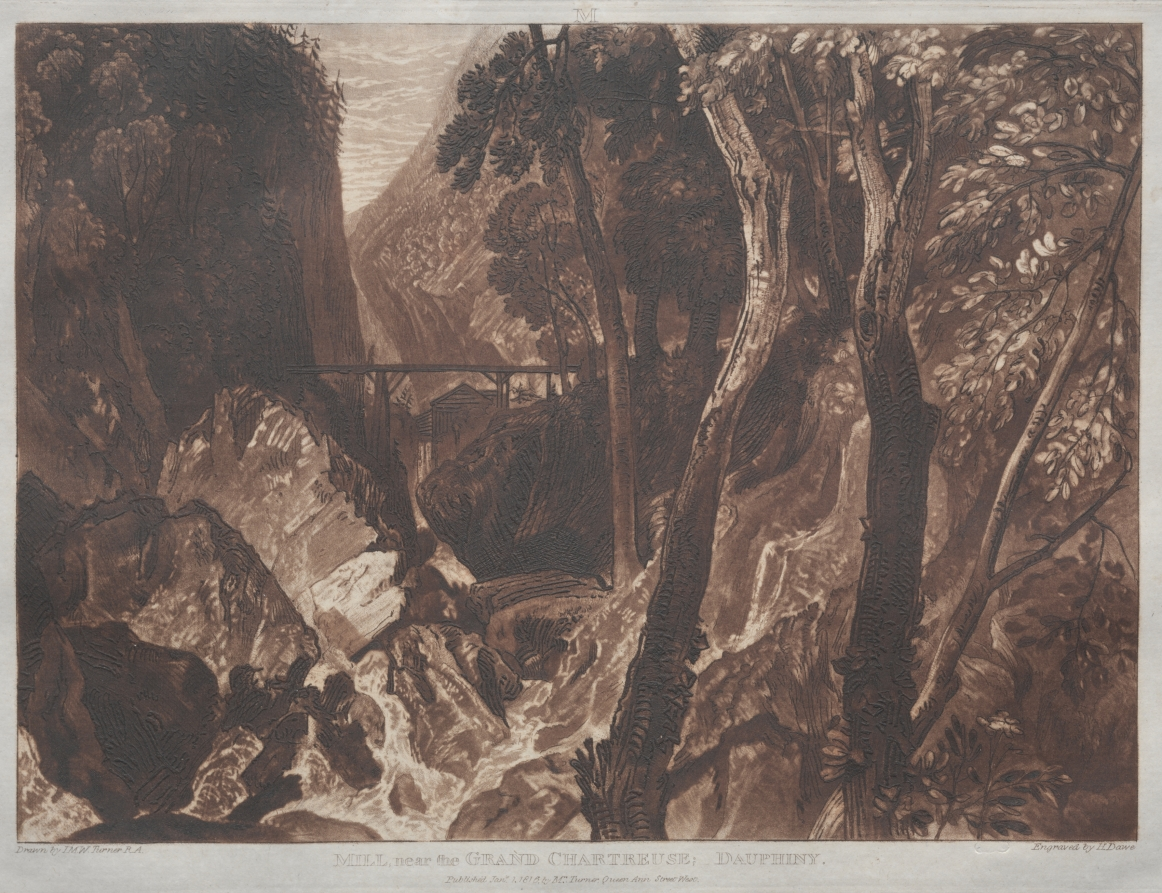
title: Liber Studiorum: Mill near the Grand Chartreuse, Dauphiny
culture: England, 19th century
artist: Joseph Mallord William Turner (British, 1775–1851)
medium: etching and mezzotint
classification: Print